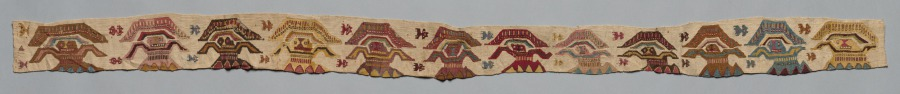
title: Lower Border of a Garment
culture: Central Andes, North Coast, Chimú or Lambayeque (Sican) People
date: 1000–1470s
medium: tapestry; wool and cotton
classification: Textile